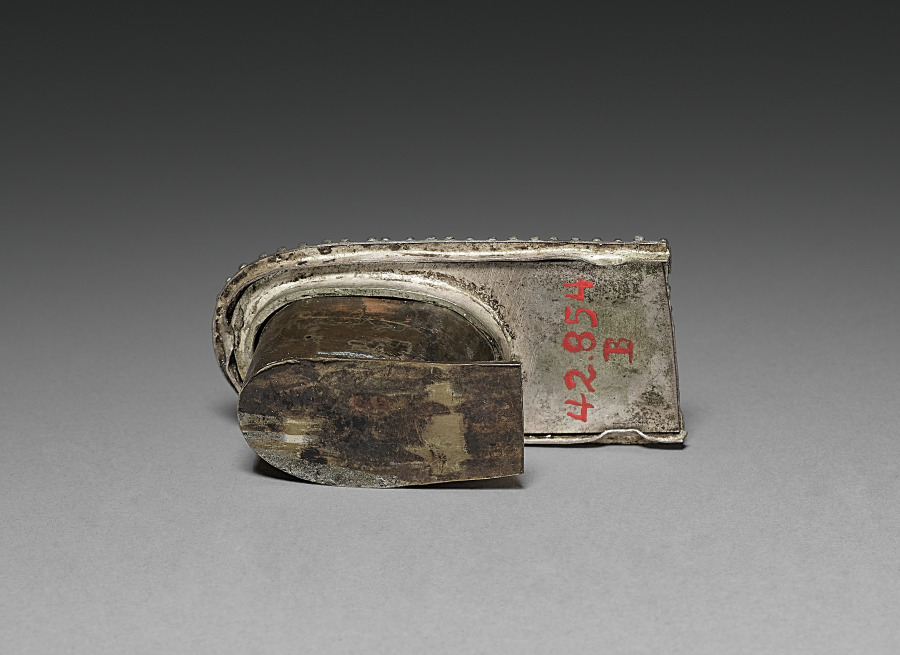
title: Pen and Ink Box (inkwell)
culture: Iran, Qajar period (1779-1925)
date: 1800s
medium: silver filigree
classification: Metalwork